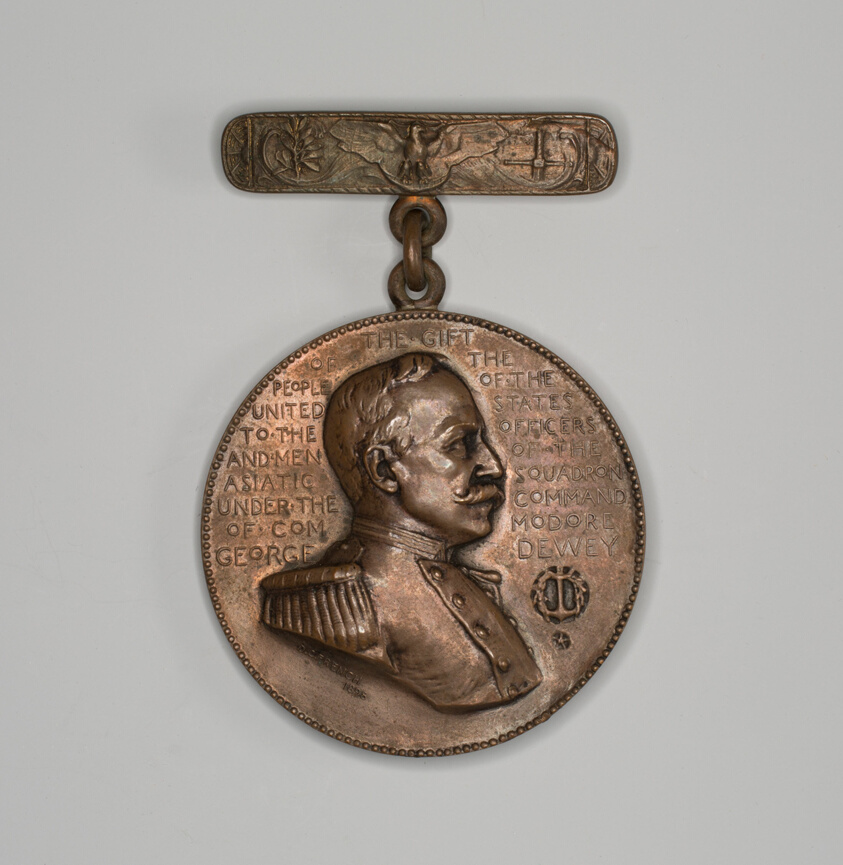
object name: Metalwork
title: Dewey medal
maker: Daniel Chester French (American, 1850–1931); Tiffany and Company (American, founded 1837); New York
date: c. 1898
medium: Bronze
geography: New York City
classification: medal; american arts; decorative arts